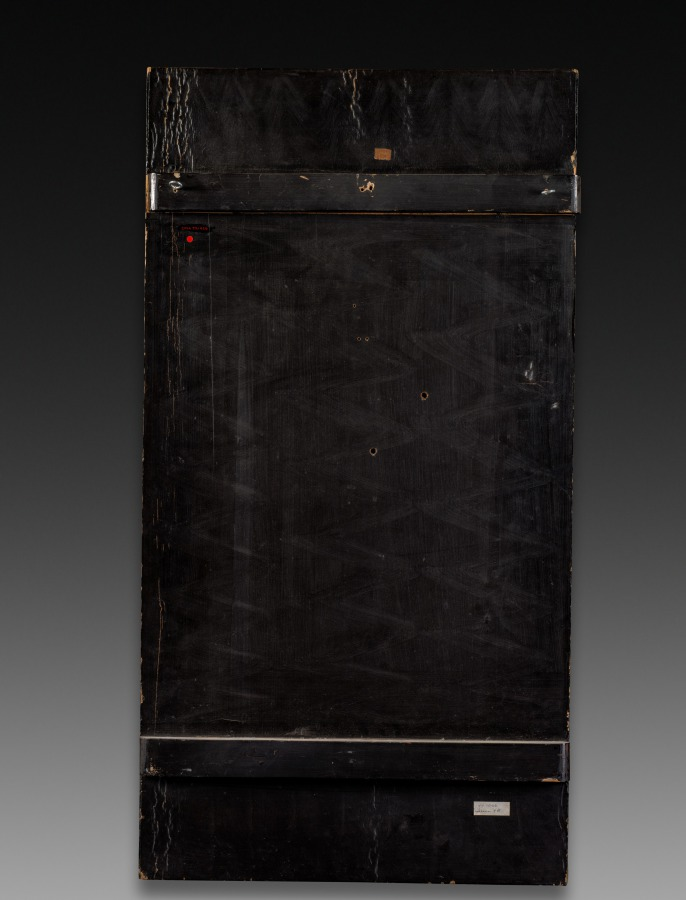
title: Decorative Panel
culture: Japan, Edo period (1615–1868) to Meiji period (1868–1912)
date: 1800s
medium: lacquer with ivory inlays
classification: Lacquer